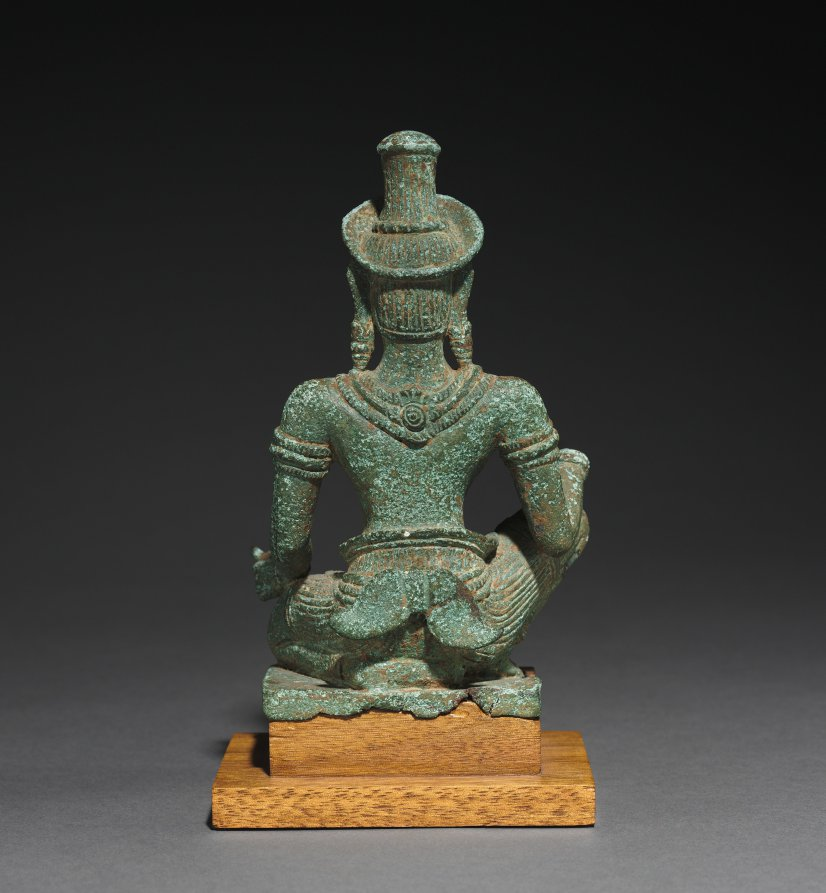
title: Kneeling Worshipper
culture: Cambodia, Angkor Wat style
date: 1100s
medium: bronze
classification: Sculpture